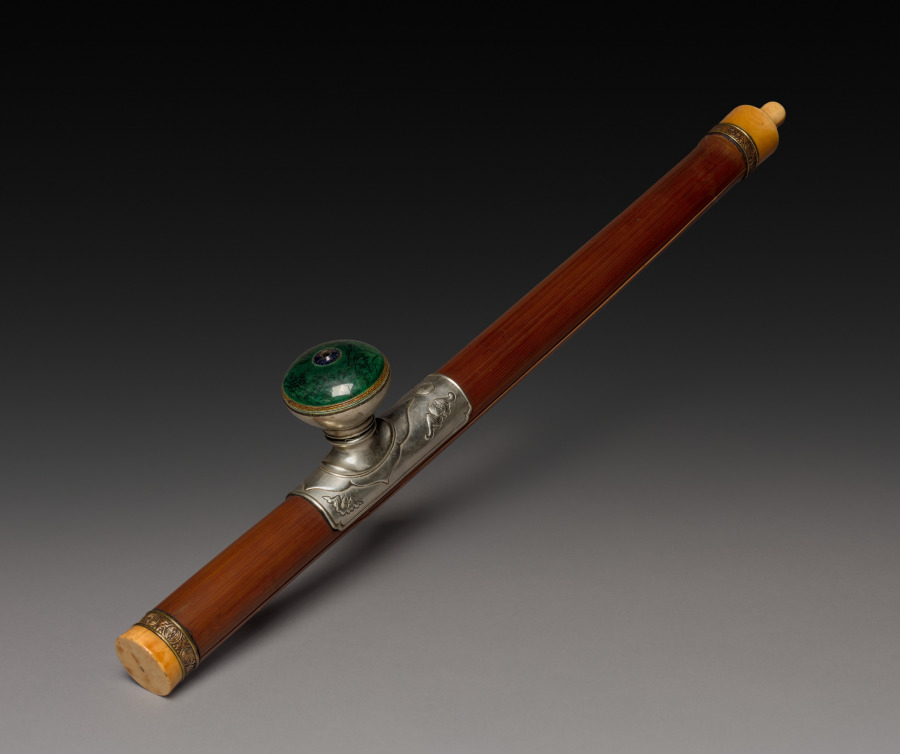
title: Opium Pipe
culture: China, Qing dynasty (1644-1911)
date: 1800s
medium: wood with ivory and silver decoration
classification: Miscellaneous